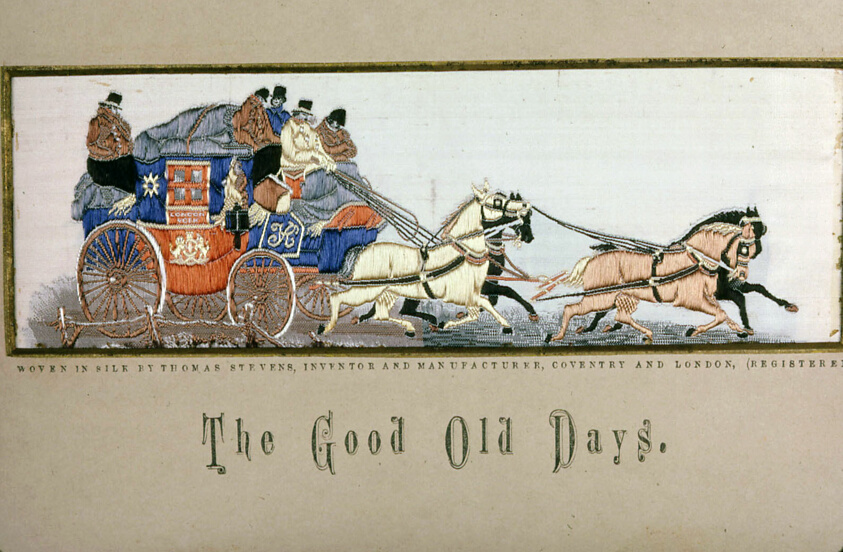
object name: Textile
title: "The Good Old Days" (Royal Mail Coach)"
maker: Woven by Thomas Stevens (English, 1828–88); Coventry and Lodon, England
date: After 1879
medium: Silk, plain weave with supplementary brocading wefts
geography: Coventry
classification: textile; weaving